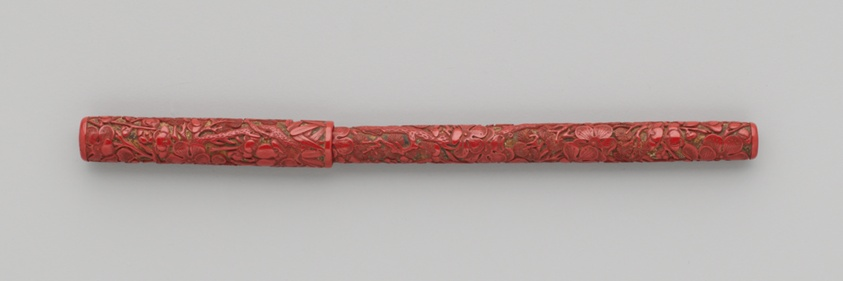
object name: Decorative Arts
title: Writing Brush and Cover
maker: China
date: Late Ming（1368-1644）or early Qing（1644-1912）dynasty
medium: Cinnabar Lacquer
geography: China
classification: lacquer